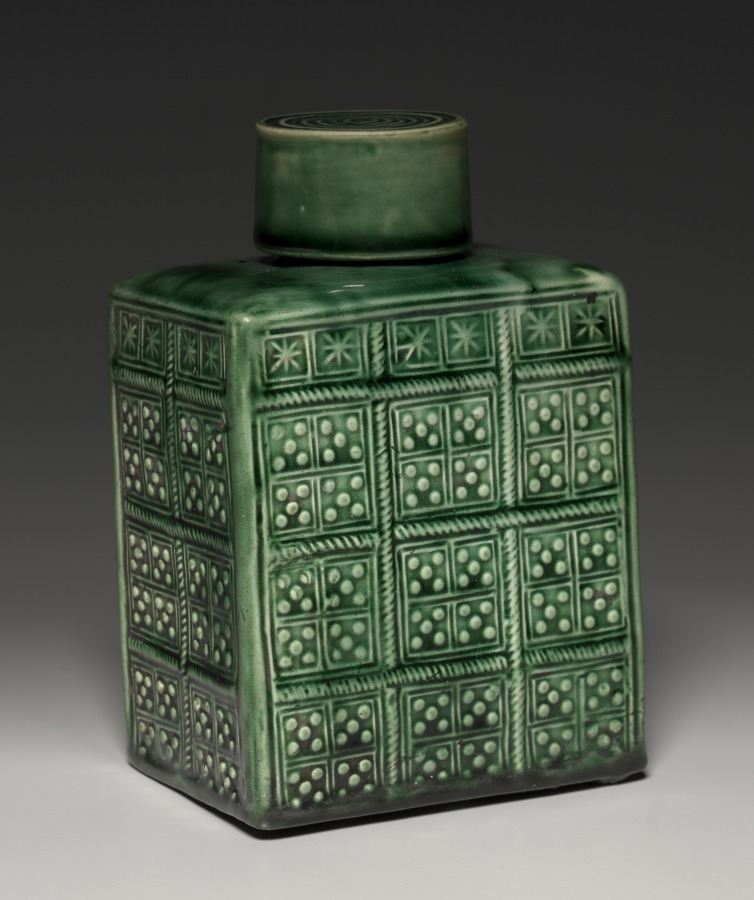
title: Tea Caddy with Lid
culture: England, 18th century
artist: Staffordshire Factory (British)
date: c. 1750–1800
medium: earthenware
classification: Ceramic